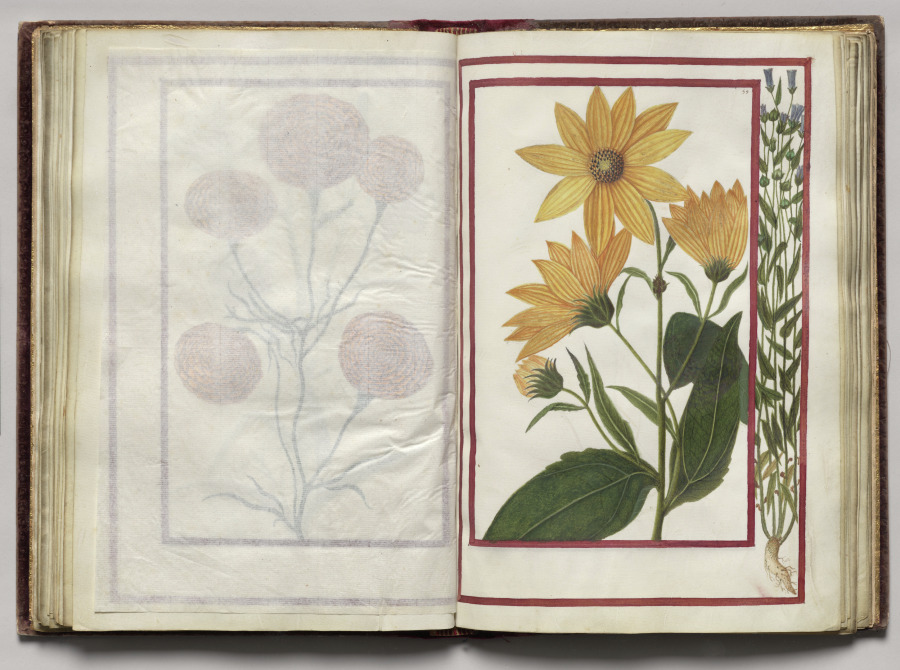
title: Florilegium (A Book of Flower Studies)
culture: France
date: 1608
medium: bound manuscript of 48 leaves, 77 drawings; watercolor, ink, silver, and gold over occasional traces of pencil, on vellum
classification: Bound Volume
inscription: Dated: Poitiers 1608 (on frontispiece) Signed: On frontispiece in black ink, lower right: Van Kuyk Notation on drawing: Frontispiece: in pencil, lower margin: * élève de Van Kessel, peintre flammand (* in pencil also appears in front of Van Kuyk's name).